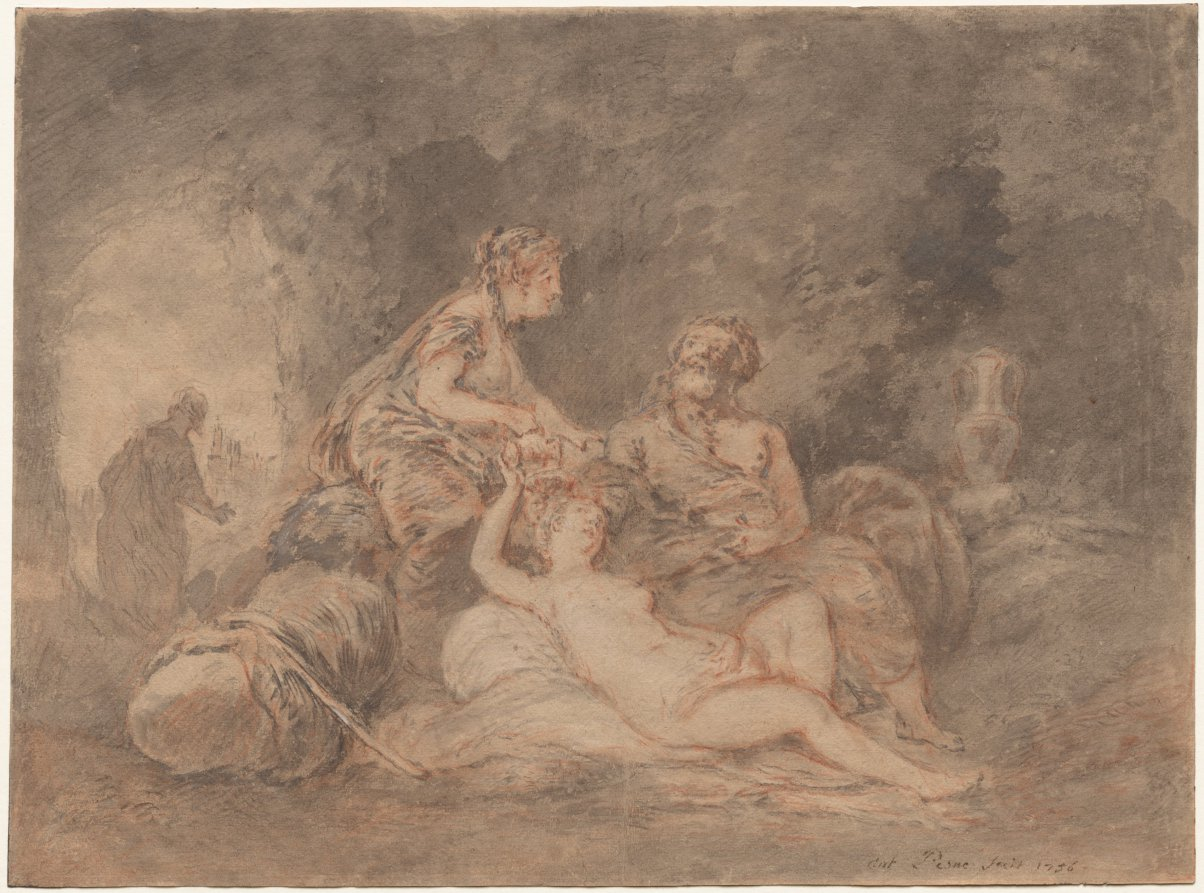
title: Lot and His Daughters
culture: France, 18th century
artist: Antoine Pesne (French, 1683–1757)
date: 1756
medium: black and red chalk wash, gray wash, heightened with white gouache; framing lines in black ink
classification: Drawing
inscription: signed, lower right, in brown ink: Ant Pesne fecit 1756